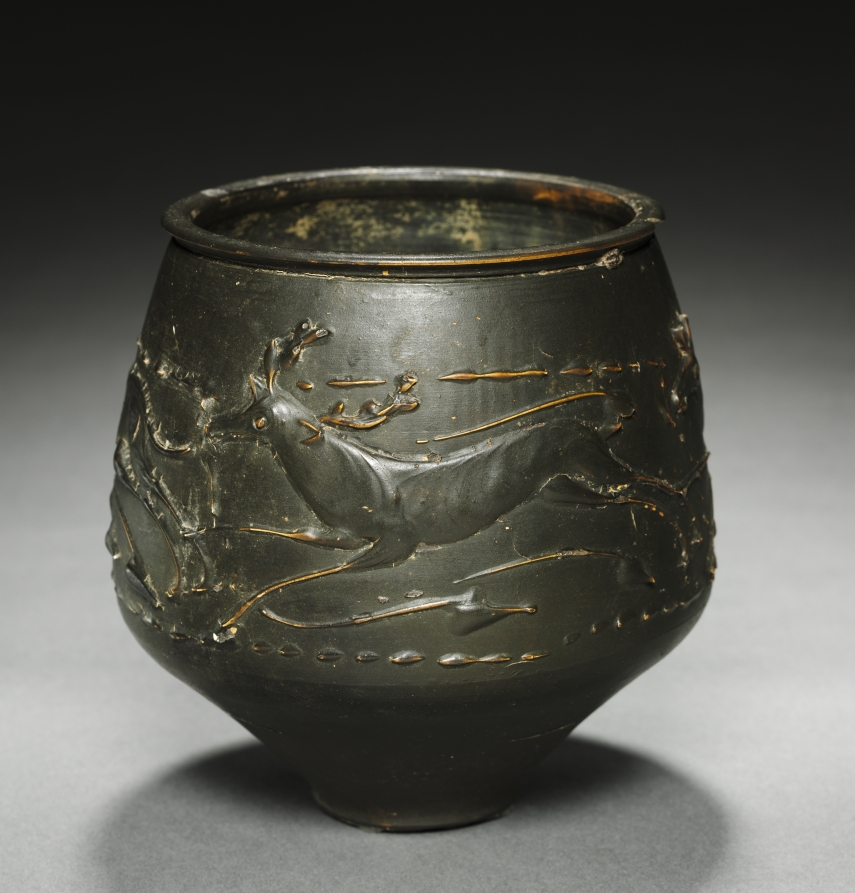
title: "Caster Ware" Vase with Hunt Scene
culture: Rhenish (Cologne), Gallo-Roman, mid-2nd Century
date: mid-100s CE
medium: reddish ware with black burnished slip and Barbotine decoration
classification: Ceramic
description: The wide body of this vase is decorated with a hunting scene in which a stag, doe, hare, and hound chase each other around the vessel. Dotted lines above and below the animals form a border around the scene, though the heads of the creatures occasionally poke above it. While larger barbotine decorations were usually mold made and applied to a leather-hard surface, the figures on our pot were piped on by hand.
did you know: “Hunt cups” like this one were a specialty of artisans working in Roman Cologne during the 2nd century CE.